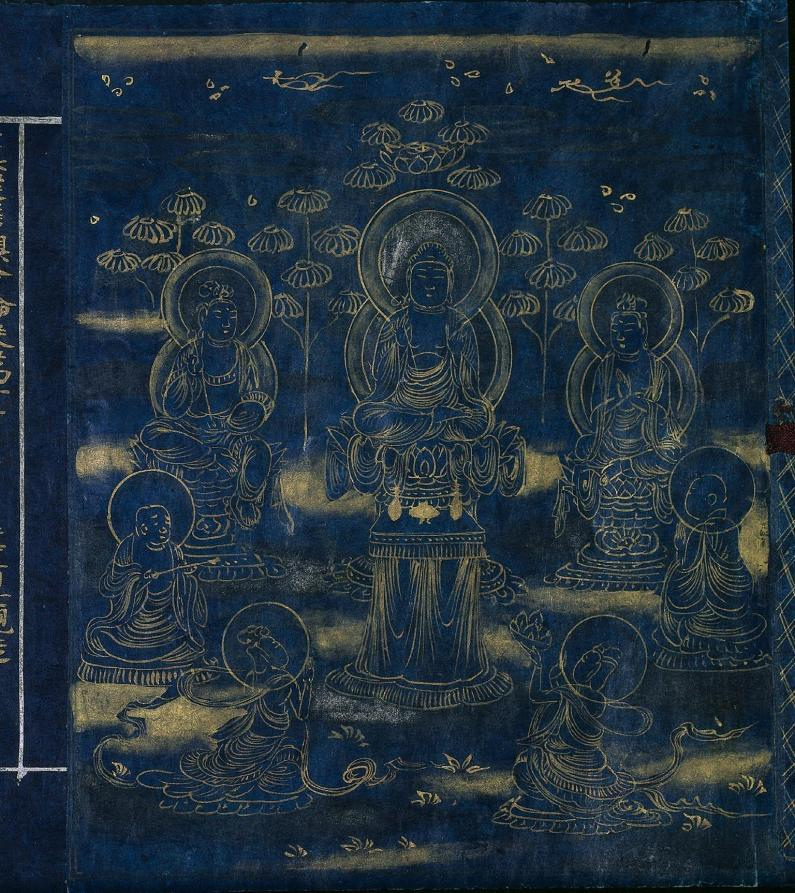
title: Meta-Discourse on the Teachings from the Treasury (Abidharmakosha-Bhashya)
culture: Japan, Heian period (794–1185)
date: 1100s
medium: handscroll; gold and silver on indigo-dyed paper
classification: Manuscript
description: This religious text relates some of the teachings of the great fourth-century Indian Buddhist scholar Vasubhandhu. The text analyzes human consciousness in its relationship to the environment and transformations that occur during meditation. This scroll is the 17th part of a 30-part translation of the text by Xuanzang, an eminent seventh-century Chinese monk.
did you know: The frontispiece depicts the Buddha Shakyamuni preaching in a paradisical landscape.